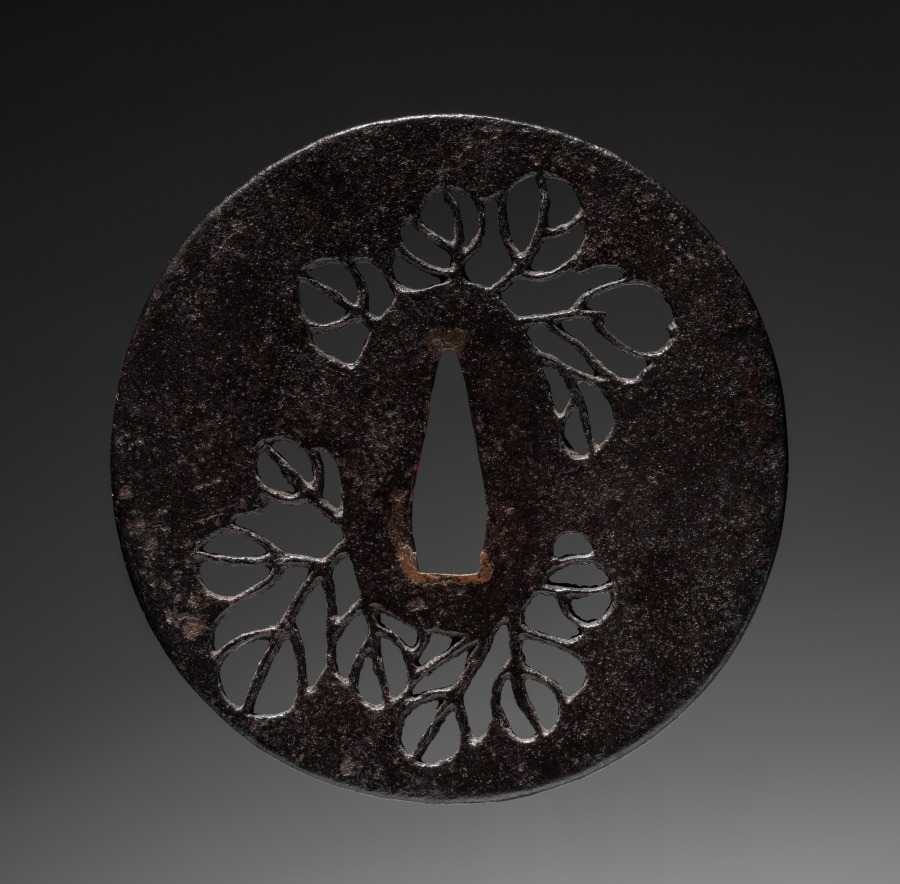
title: Sword Guard (Tsuba) with Leaves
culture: Japan, possibly Edo period (1615–1868)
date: c. 1615–1868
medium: metal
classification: Arms and Armor